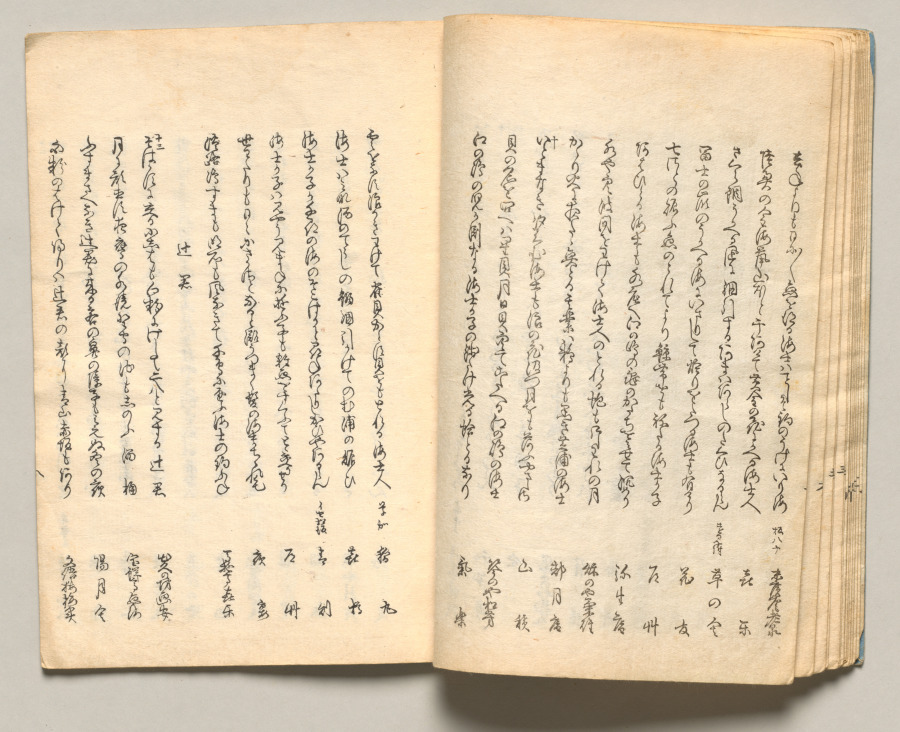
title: Spread Fifteen from Volume Three of People of Japan in Light Verse (Kyōka)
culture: Japan, Edo period (1615–1868)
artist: Utagawa Hiroshige (Japanese, 1797–1858)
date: 1857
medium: Woodblock-printed book; ink and color on paper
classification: Bound Volume